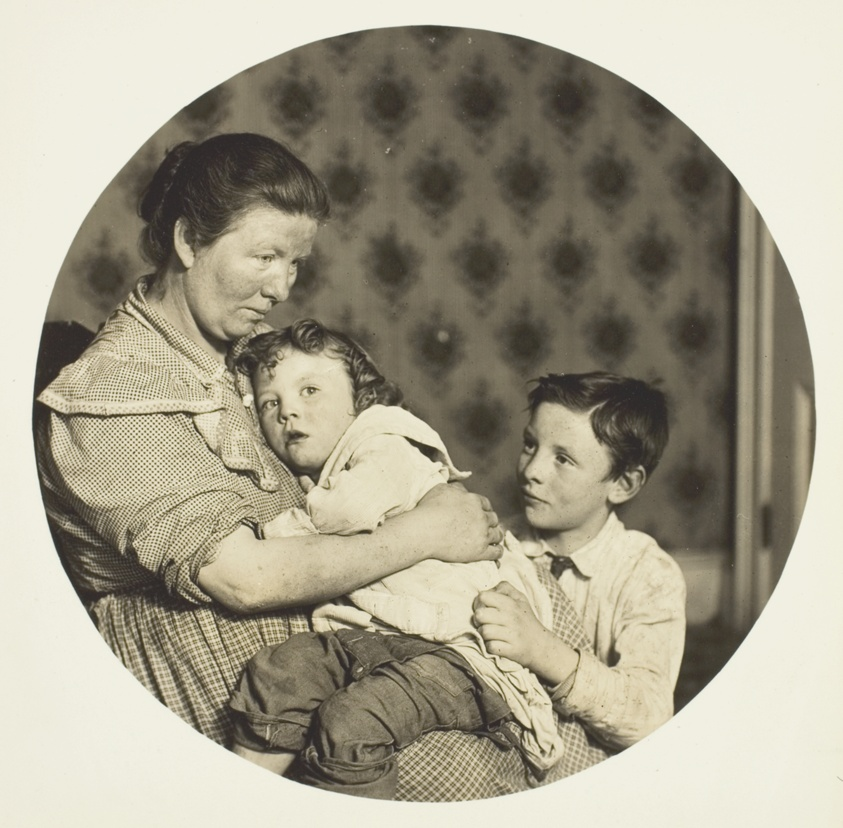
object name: Photograph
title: A Madonna of the Tenements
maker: Lewis Wickes Hine (American, 1874–1940)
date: 1904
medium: Gelatin silver print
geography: United States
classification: gelatin silver (developing-out-paper) pr; photographic process; photography; photograph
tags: Collected by Hugh Edwards, documentary